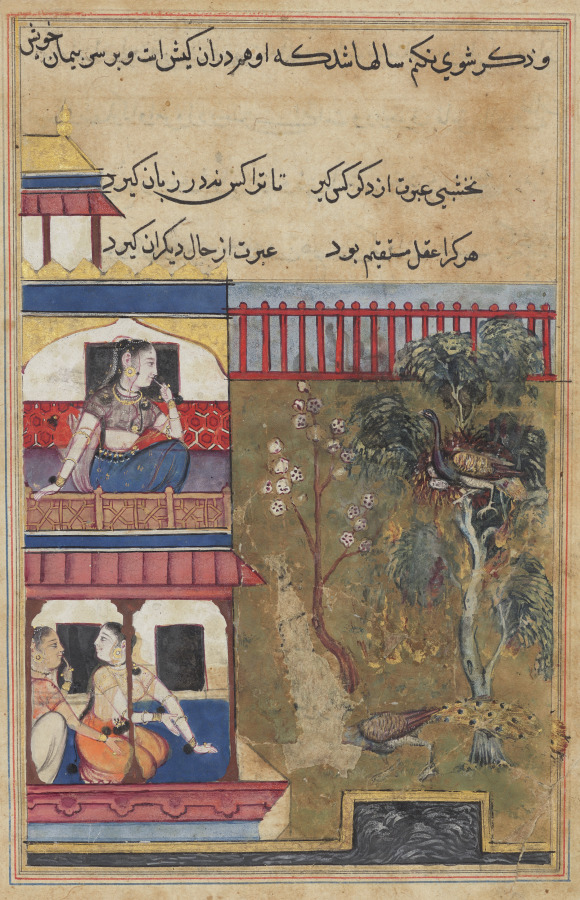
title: The queen of Rum watches the peahen prefer to burn rather than abandon her eggs while the peacock flees the nest, from a Tuti-nama (Tales of a Parrot): Thirty-ninth Night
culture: Mughal India, court of Akbar (reigned 1556–1605)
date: c. 1560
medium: gum tempera, ink, and gold on paper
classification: Painting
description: The queen of Rum sits in the upper balcony of her palace watching the fire in her garden with shock. Two female attendants observe the action from the room below. The cowardliness of the peacock in the face of danger convinced the queen of the disloyalty of men. As a result, she vowed to never marry.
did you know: Rum is the Arabic name of Rome and once designated the Byzantine Empire.